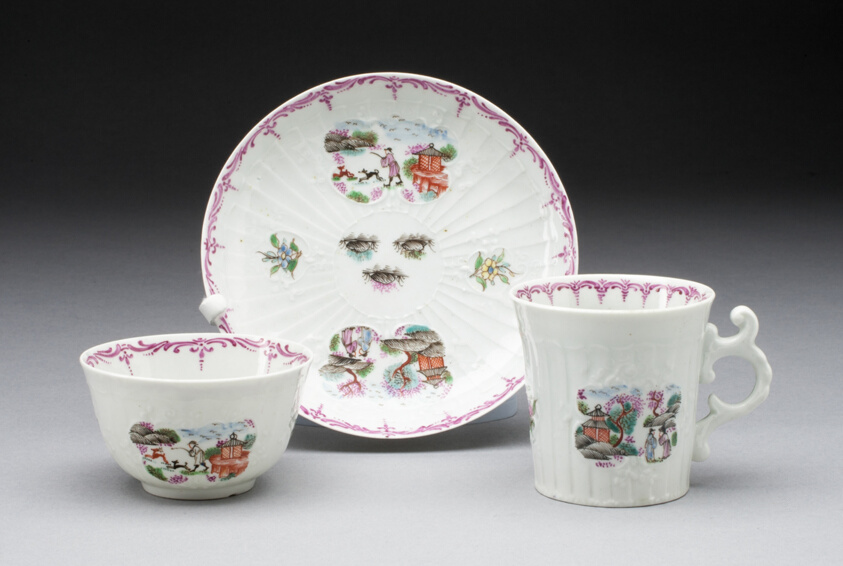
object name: Ceramics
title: Tea Bowl, Coffee Cup, and Saucer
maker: Worcester Porcelain Factory (Warmstry House Period, 1751–1783); Worcester, England, founded 1751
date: c. 1760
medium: Soft-paste porcelain, polychrome enamels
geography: Worcester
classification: drinking vessel; teaware; porcelain; european decorative arts; ceramics